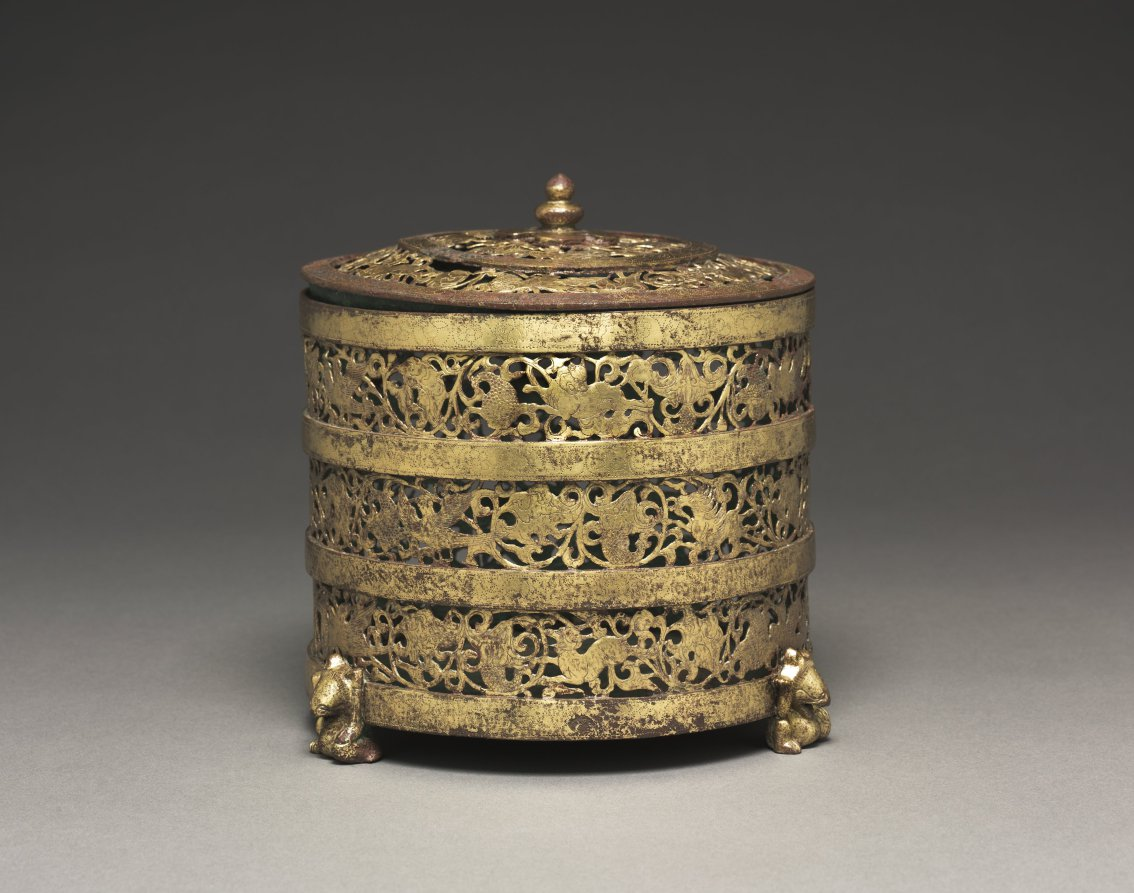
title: Cylindrical Container with Cover (Lian)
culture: China, Han dynasty (202 BCE–220 CE)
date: 100 BCE–100 CE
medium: gilt bronze with openwork and chased designs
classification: Metalwork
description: This magnificent gilded bronze vessel with openwork decoration shows all kinds of fabulous creatures, real and imaginary, chasing each other among swirling scrolls. There is an emphasis on the unbroken rhythms of movement, rather than the ferocity of animals in combat. Cylindrical bronze vessels in this shape, called lian, were often used as cosmetic boxes.